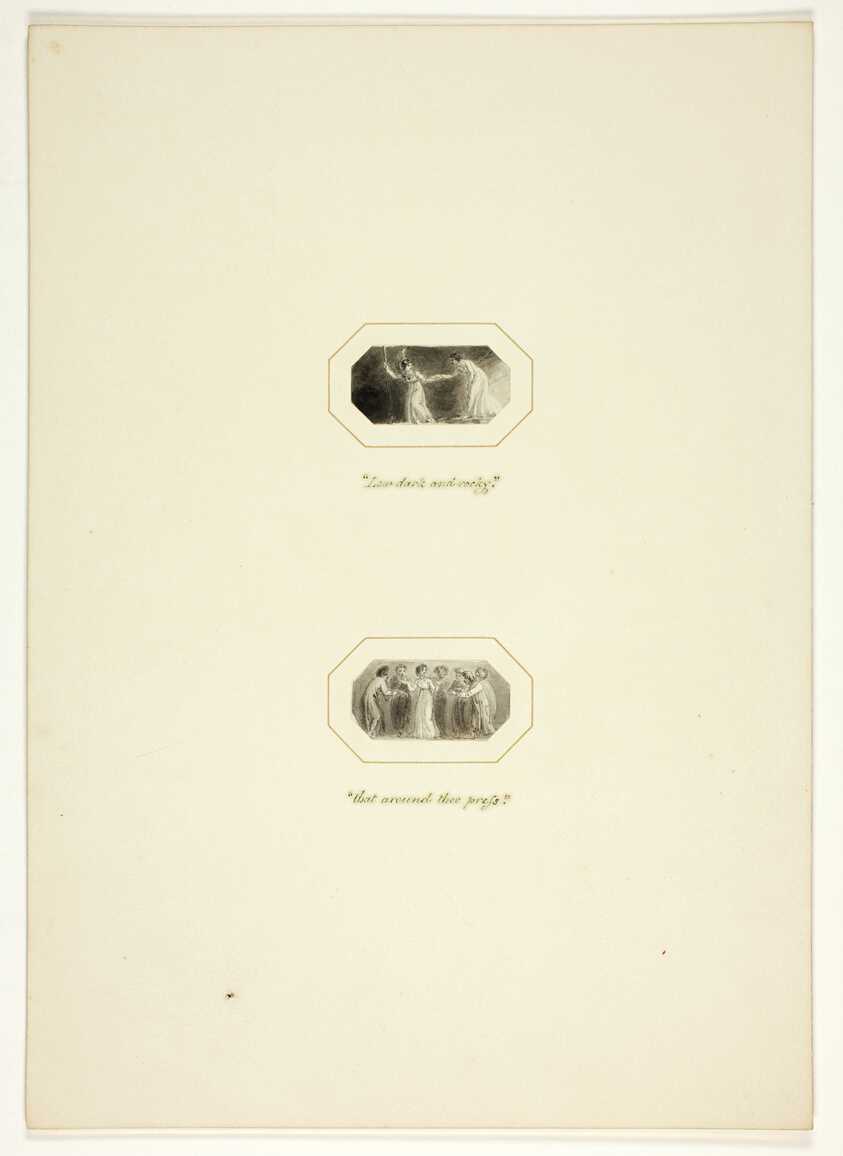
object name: Drawing and Watercolor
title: Study for a plate from The Triumphs of Temper, in the 1796 Royal Engagements Pocket Book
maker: Thomas Stothard (English, 1755-1834)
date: c. 1795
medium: Ink wash on paper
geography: England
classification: ink or chalk wash; drawings (visual works); prints and drawing